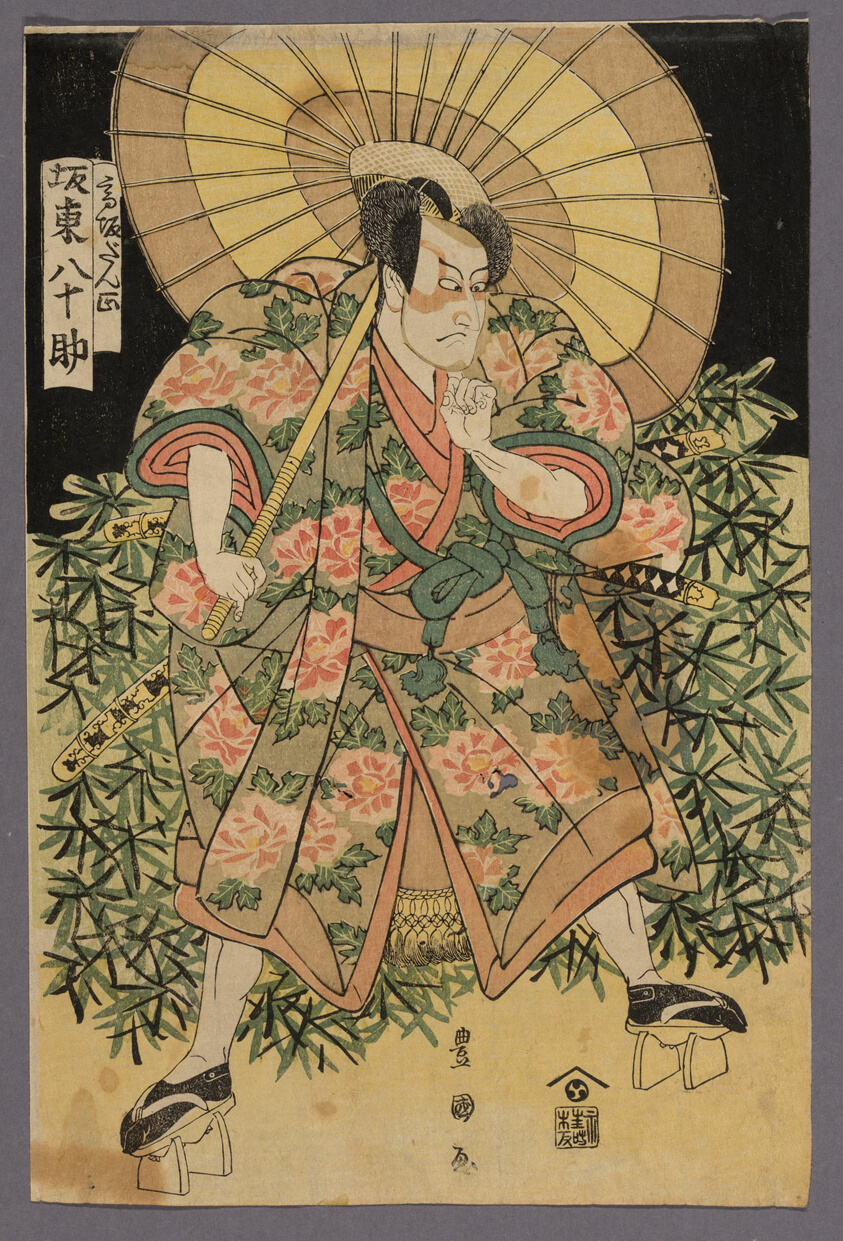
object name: Print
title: The Actor Bando Yasosuke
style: Japanese (culture or style)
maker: Utagawa Toyokuni I 初代 歌川 豊国; Japanese, 1769–1825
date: 1801/08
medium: Color woodblock print; oban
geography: Japan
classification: woodblock print; print; asian art